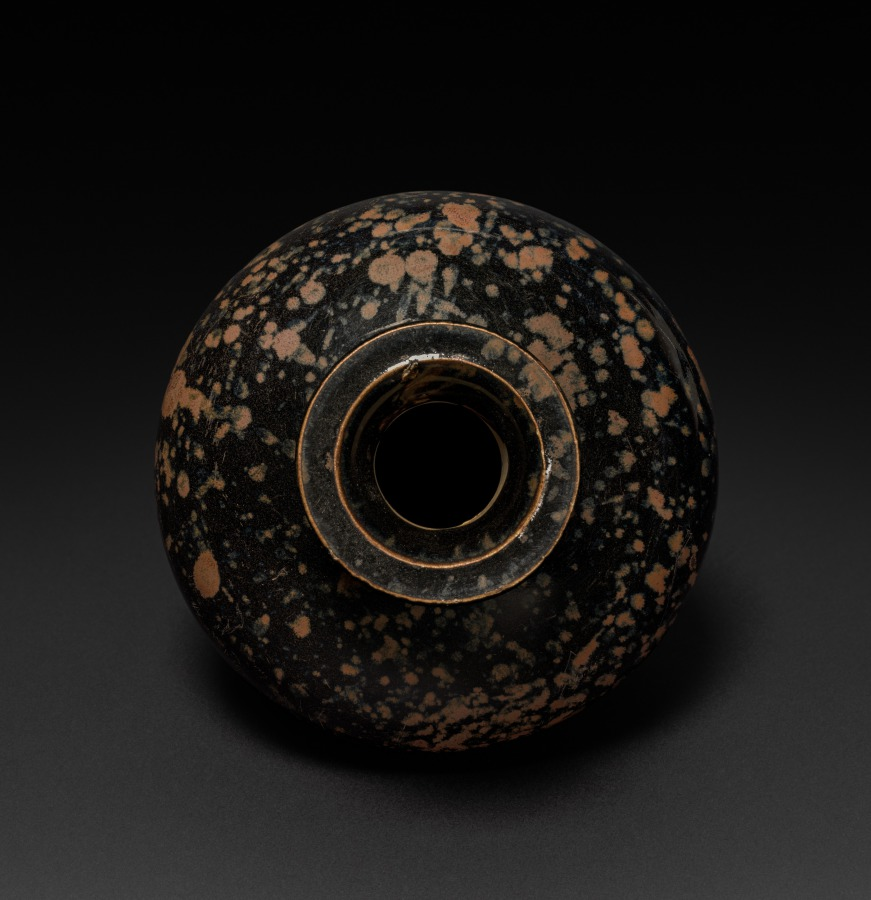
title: Vase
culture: China, Northern Song dynasty (960-1127)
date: 1000s–1100s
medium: glazed stoneware with underglaze iron decoration, Northern Black ware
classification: Ceramic